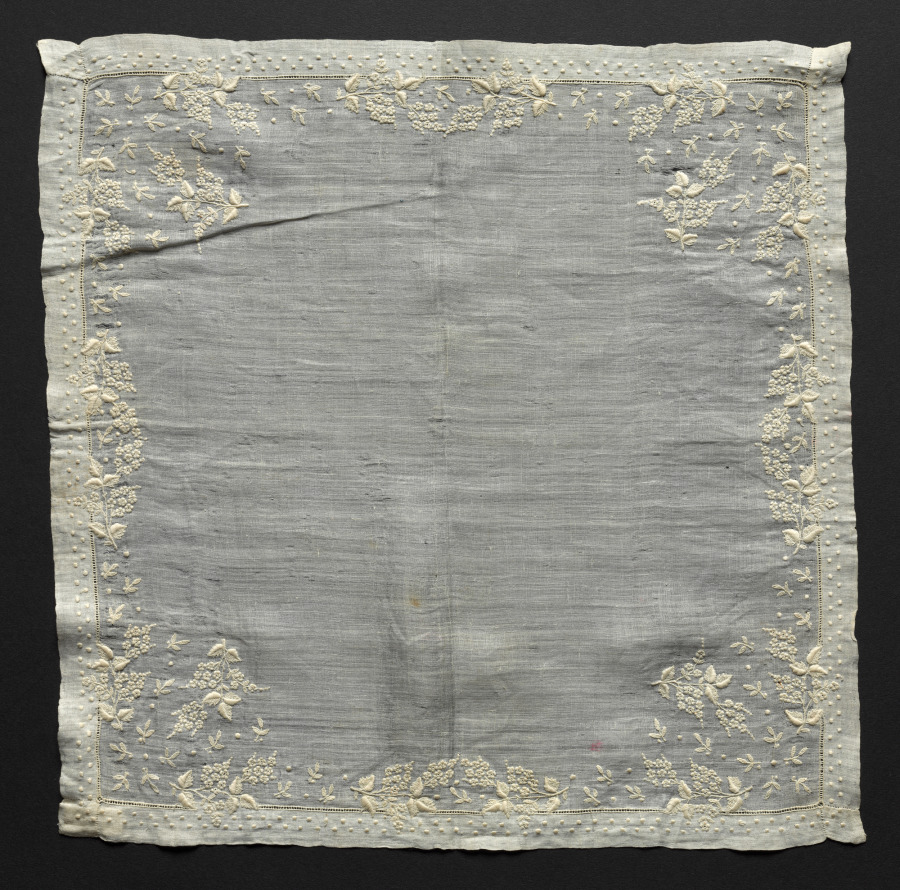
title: Embroidered Handkerchief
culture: Austria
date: 1800s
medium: Plain weave linen: embroidered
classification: Embroidery